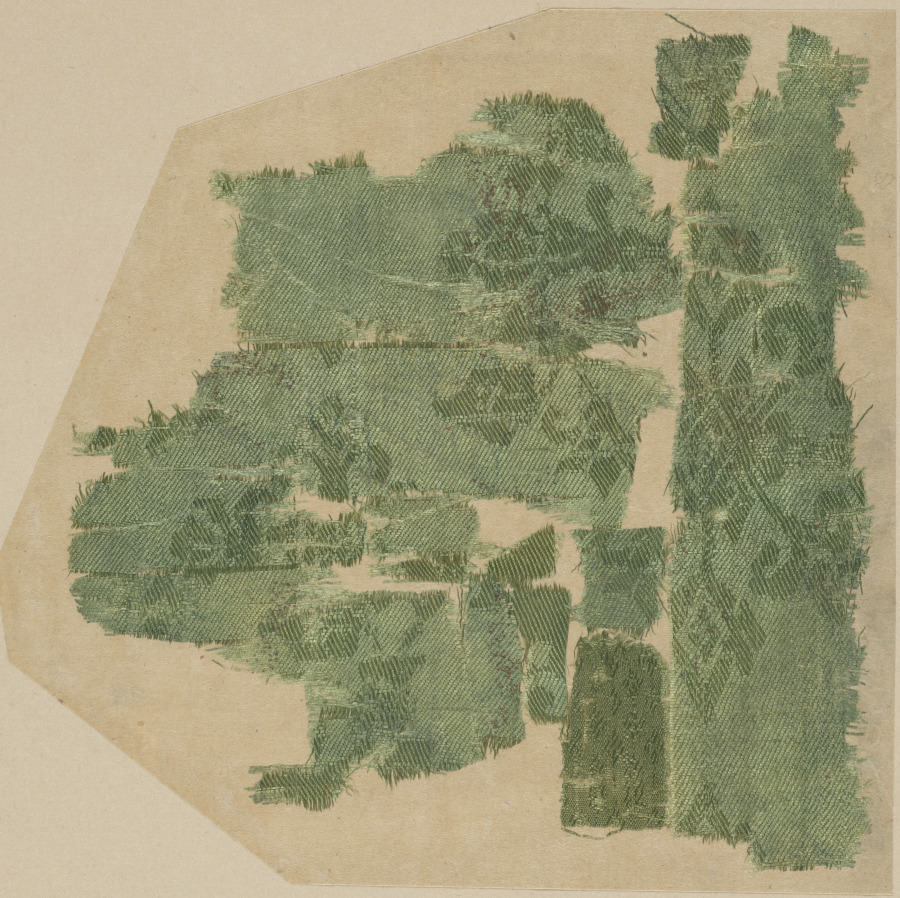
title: Fragment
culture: China, 8th century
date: 700s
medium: silk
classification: Textile